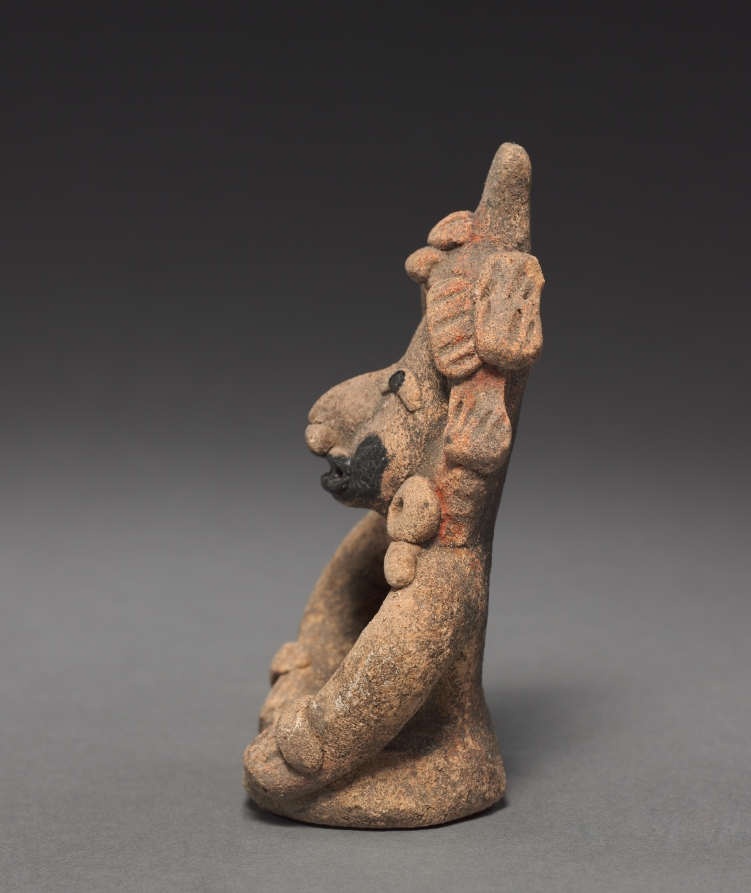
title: Seated Figurine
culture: Mexico, Veracruz, Remojadas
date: c. 150–1 BCE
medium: earthenware with asphalt paint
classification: Sculpture